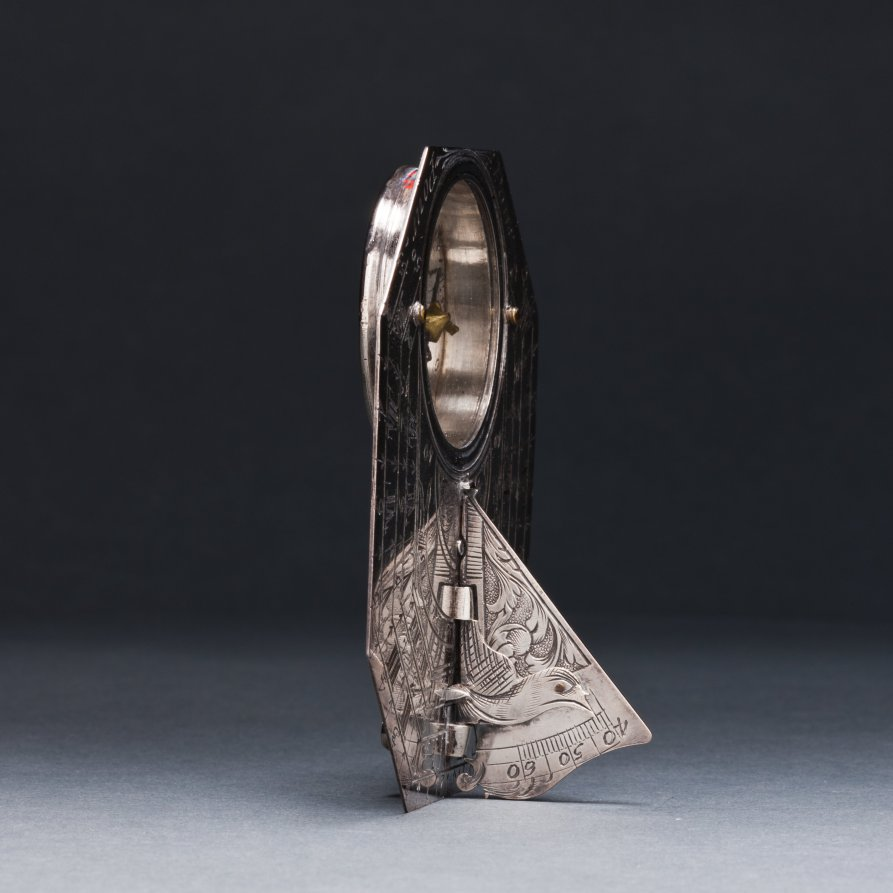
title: Butterfield Sundial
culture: France, 18th century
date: 1700s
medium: silver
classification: Silver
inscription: [Engraved signature above the compass in ribbon band]: "N. BION A Paris"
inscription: [Engraved on the face of the sundial]: “Pour 55° 4-5-6-7-8-9-10-11 50° IIII-V-VI-VII-VIII-IX-X-XI 45° 5-6-7-8-9-10-11 40° -VI-VII-VIII-IX-X-XI'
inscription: [Engraved on the other side]: "Pour 55° -8-7-6-5-4-3-2-1-0 50°-VIII-VII-VI-V-IIII-III-II-I 45°-8-7-6-5-4-3-2-1 40°-VII-VI-V-IIII-III-II-I"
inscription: [Engraved around the compass]: “NORD-OUEST-SUD-EST”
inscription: [Engraved on the back of the sundial]: “Turin 44 Milan 46 Paris 49 Lion 46 Metz 49 Rome 42 Liege 51 Naples 44 Namur 50 Gennes 44 Marseille 43 Grenoble 45 Bayonne 43 Bruxelle 51 Londres 52 Nantes 47 Vienne 48 Toulon 43 Tours 47 Lille 51”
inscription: [Engraved around the back of the compass]: “Venise 45 Strasbourg 49 Amsterdam 52 Hambourg 54 Varsovie 52 La Rochelle 46”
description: Butterfield-type sundials are characterized by their adjustable gnomons, metal flaps that cast a shadow on the dial’s face to indicate the hour, and geographical indices. This sundial has a scale adjustable between latitudes of 40° to 60° north. The latitudes of 26 European towns are engraved on its back for quick reference. With an intricately engraved silver face, it would have functioned as a fashionable traveler’s accessory.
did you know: Butterfield-style sundials were named after Micheal Butterfield, an English scientific and mathematical instrument maker who worked in Paris between 1674 and 1724.